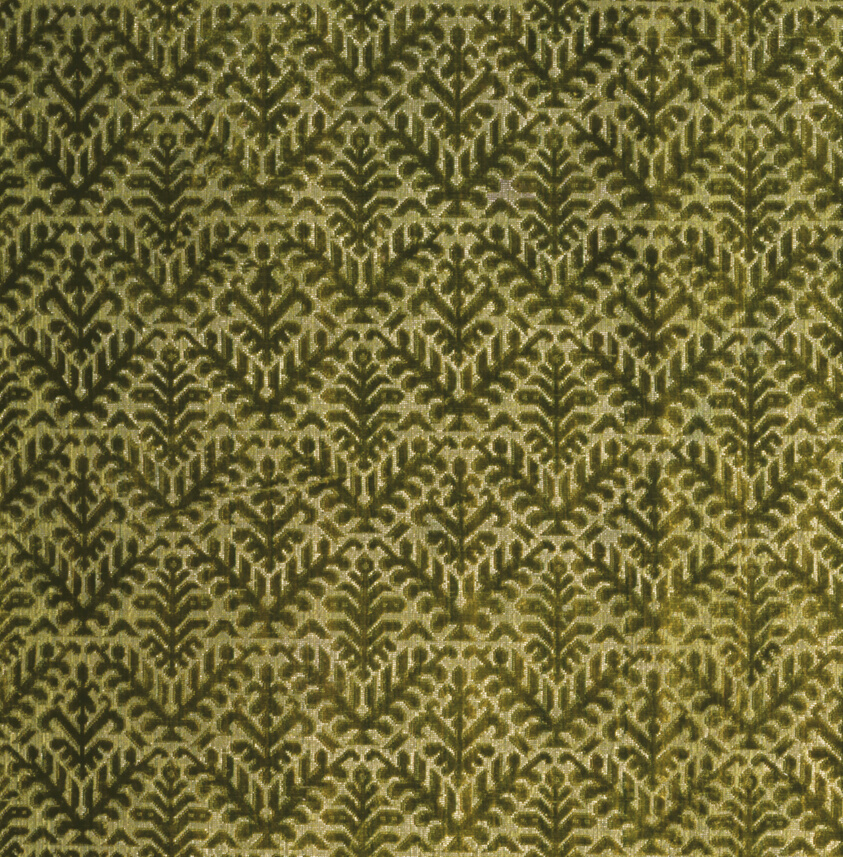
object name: Textile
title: Fragment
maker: Italy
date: Late 16th century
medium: Silk, plain weave with silvered-metal-strip supplementary facing wefts and supplementary pile warps forming cut and uncut voided velvet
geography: Italy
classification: textile; weaving - velvet